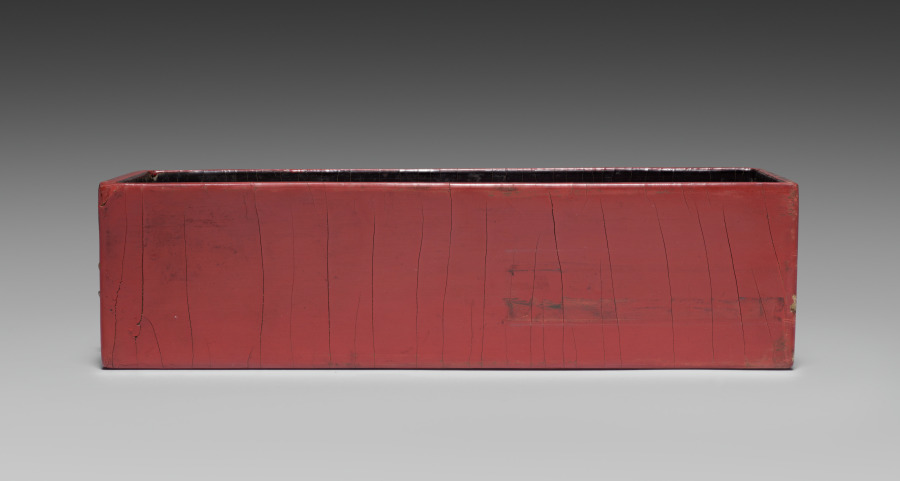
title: Drawer for a Tihong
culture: China, Ming dynasty (1368-1644), Wanli reign (1572-1620)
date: 1585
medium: carved cinnabar lacquer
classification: Lacquer